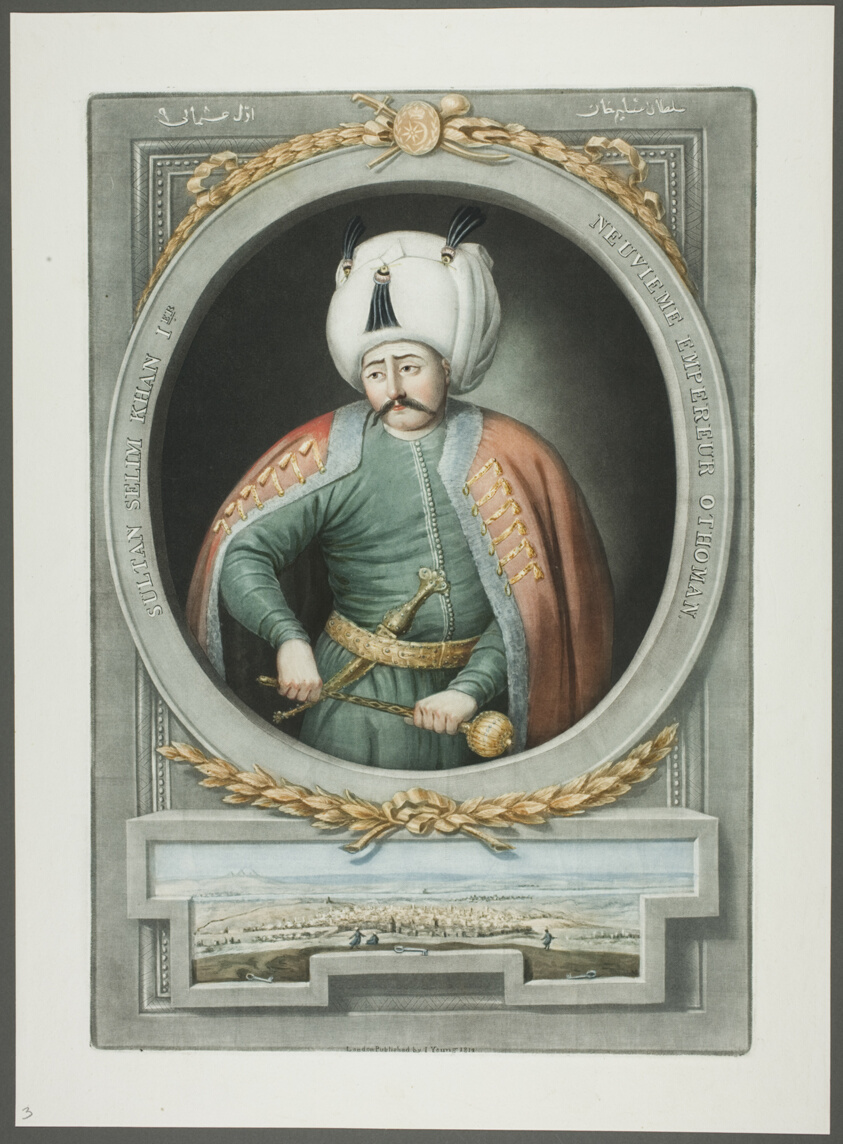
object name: Print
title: Selim Kahn I, from Portraits of the Emperors of Turkey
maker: John Young (English, 1755-1825)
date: 1815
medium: Mezzotint, hand-colored with brush and watercolor, on ivory wove paper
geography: England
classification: mezzotint; print; prints and drawing